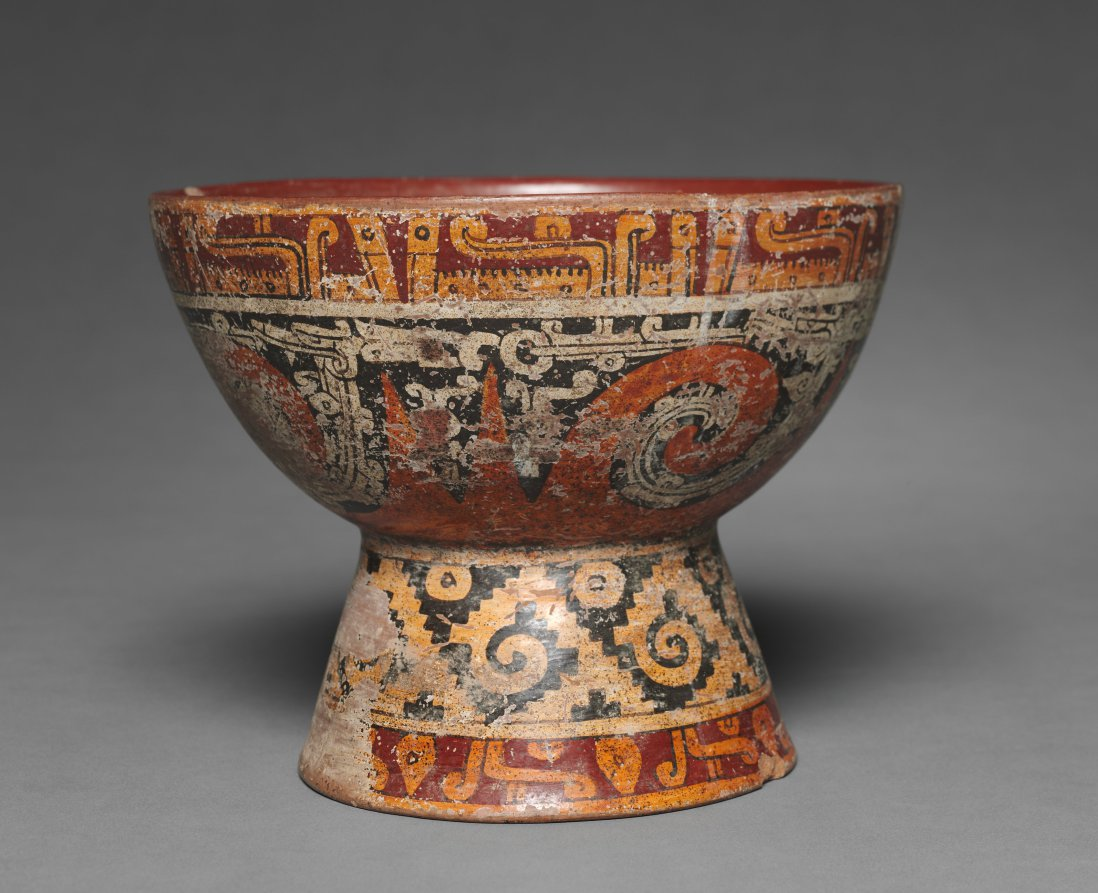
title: Pedestal Bowl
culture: Mexico, Cholula?, Mixteca-Puebla Style, 10th-16th century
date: c. 900–1519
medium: earthenware with colored slips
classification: Ceramic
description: The nobility may have used these goblets for a chocolate beverage or for pulque, made from the fermented sap of the maguey cactus. Both are painted with the precision and brilliant colors for which the Mixteca-Puebla style is renowned, and they carry some of the same motifs, such as the band of stylized animal heads at the top. The smaller bowl has a rattle base.